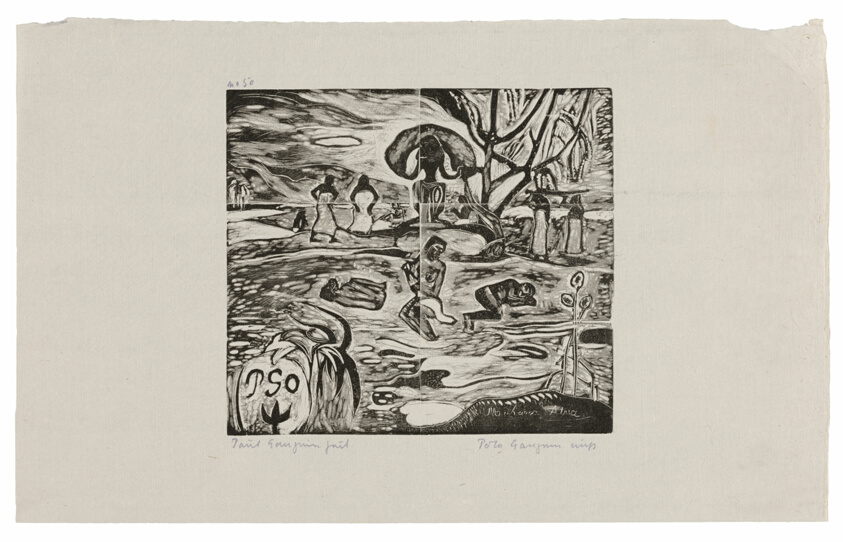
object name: Print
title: Mahana atua (Day of the God)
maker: Paul Gauguin (French, 1848-1903); printed by Pola Gauguin (Danish, born France, 1883-1961); published by Christian Cato, Copenhagen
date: 1894/95, printed and published 1921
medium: Wood-block print in black ink on grayish-ivory China paper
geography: France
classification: woodcut; print; prints and drawing